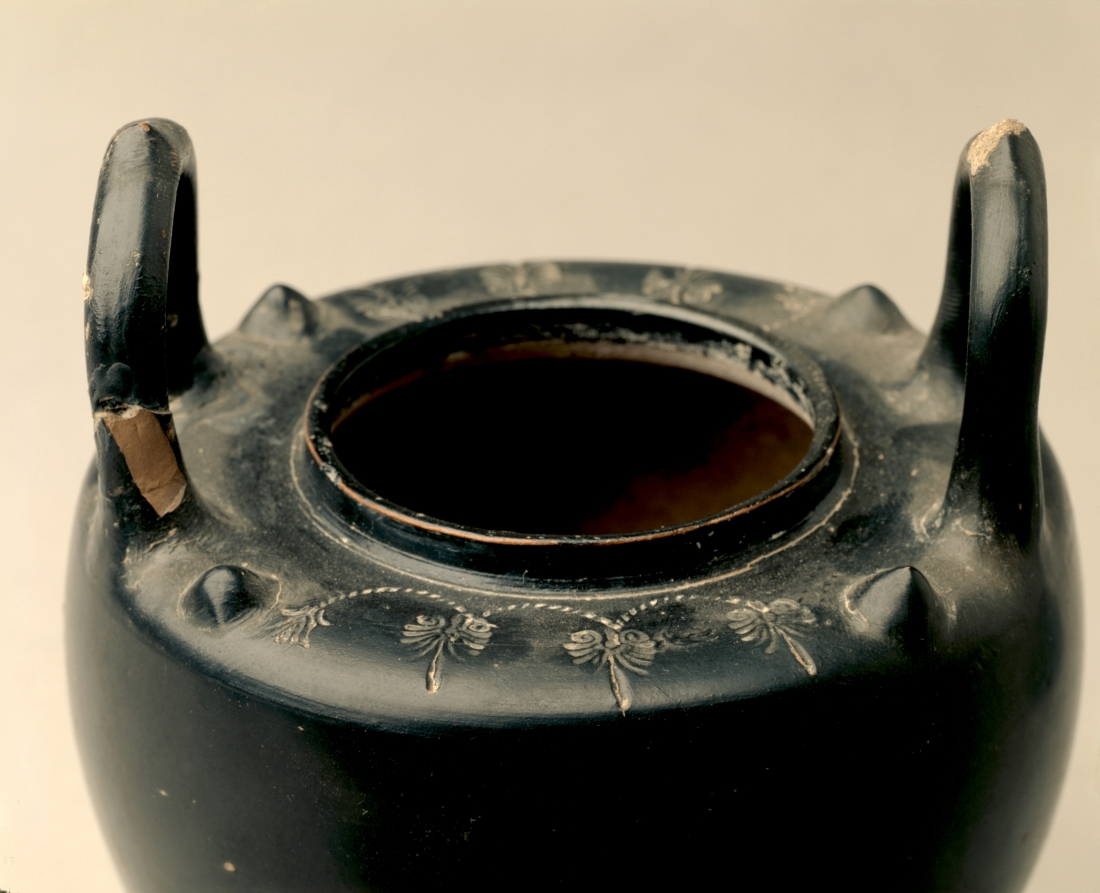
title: Black-Gloss Lebes Gamikos (Nuptial Bowl)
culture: Greek or South Italian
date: c. 425–375 BCE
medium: ceramic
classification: Ceramic